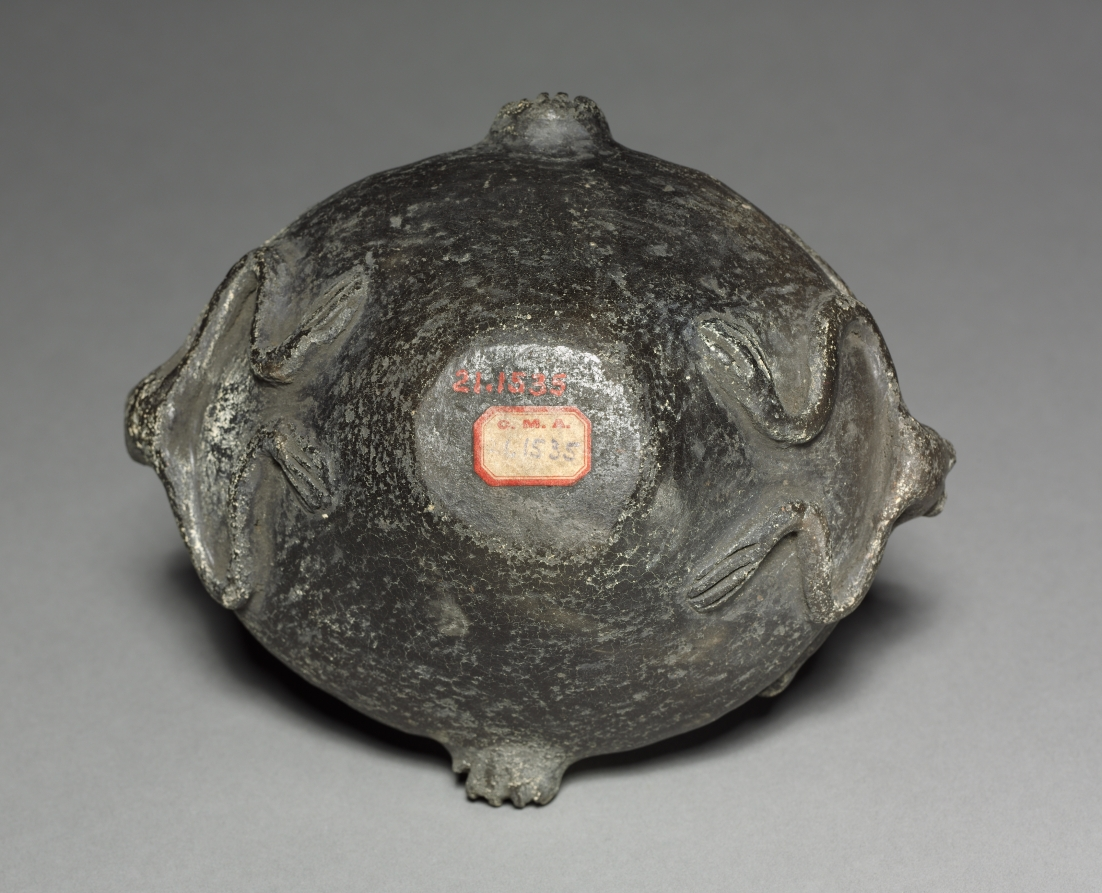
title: Bowl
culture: Colombia, 19th-20th century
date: before 1921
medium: black ware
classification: Ceramic